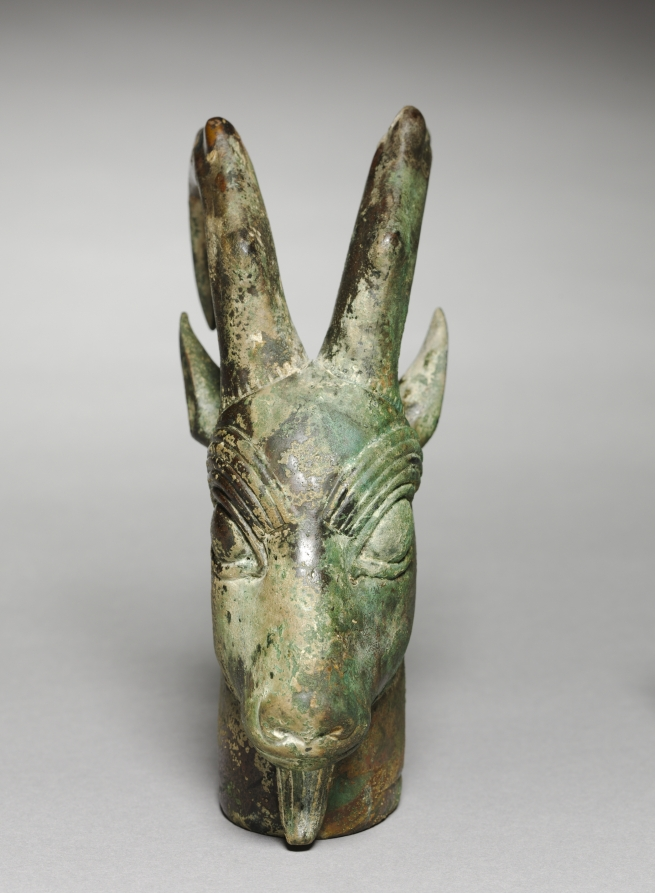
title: Ibex-Head Ornament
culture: Iran, Achaemenid (550–330 BCE)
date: c. 525–450 BCE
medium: bronze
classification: Sculpture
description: This may have decorated an ornate piece of furniture or a huge and heavily embellished bronze cauldron similar to that which the nearby bronze bull head once adorned.